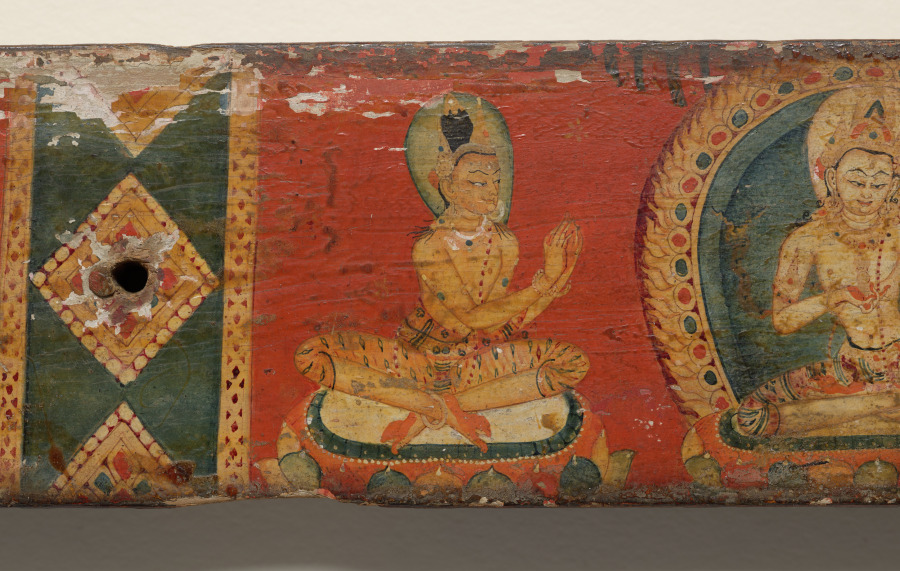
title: Four bodhisattvas and two attendants flanking Vajrasattva, bottom cover, from a Manuscript of the Perfection of Wisdom in Eight Thousand Lines (Ashtasahasrika Prajnaparamita-sutra)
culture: Eastern India, Bihar, Vikramashila Monastery. Painting: Nepal, Kathmandu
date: Sunday, September 14, 1119 (year 239 of the Newar Samvat in the month of Ashvina)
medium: Gum tempera, paper, and colors on wood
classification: Painting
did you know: The diamond pattern at the holes references the ribbons and cords that would have bound the book together.